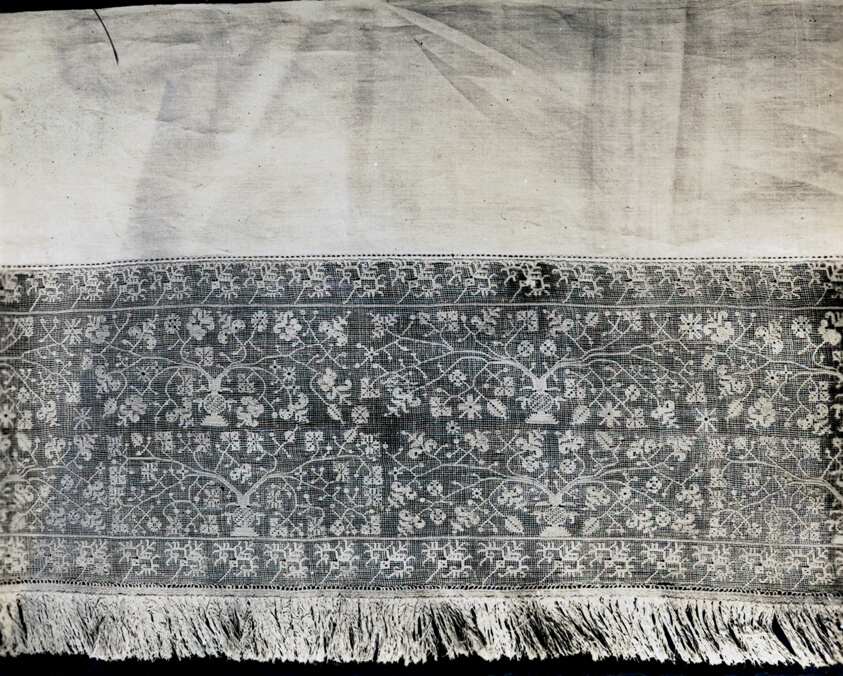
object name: Religious/Ritual Object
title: Altar Frontal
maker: Italy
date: 18th century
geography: Italy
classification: textile; needlework (visual works); liturgical; lace; altar; ritual objects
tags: altar